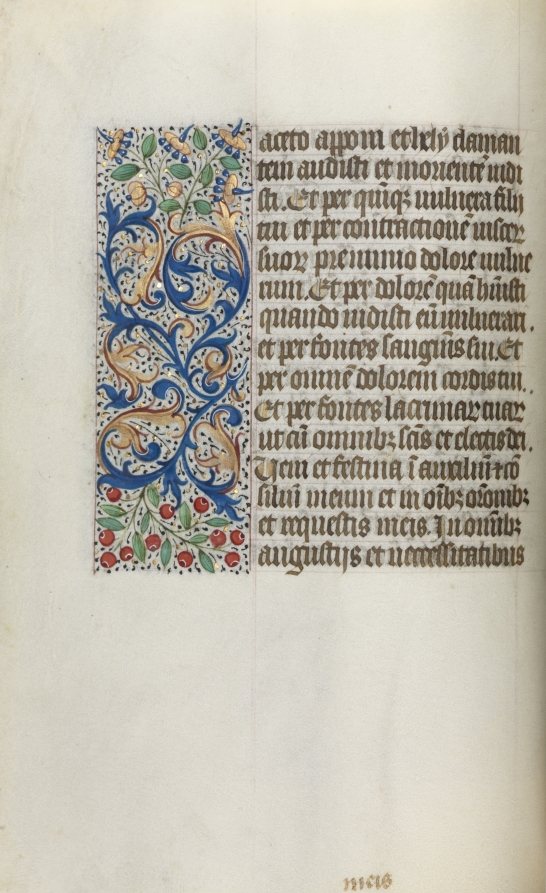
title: Book of Hours (Use of Rouen): fol. 20v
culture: France, Rouen, 15th century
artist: Master of the Geneva Latini (French, active Rouen, 1460–80)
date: c. 1470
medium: ink, tempera, and gold on vellum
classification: Bound Volume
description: In the late 1400s and early 1500s Rouen was an established and important center of book production. The city’s cathedral had a wealthy chapter that spent large sums of money to commission books and to maintain its extensive library. The stationers and booksellers would have likely been concentrated in or near the cathedral precinct. This artist, named after a manuscript now in Geneva, was Rouen’s principal illuminator during the second half of the 1400s.